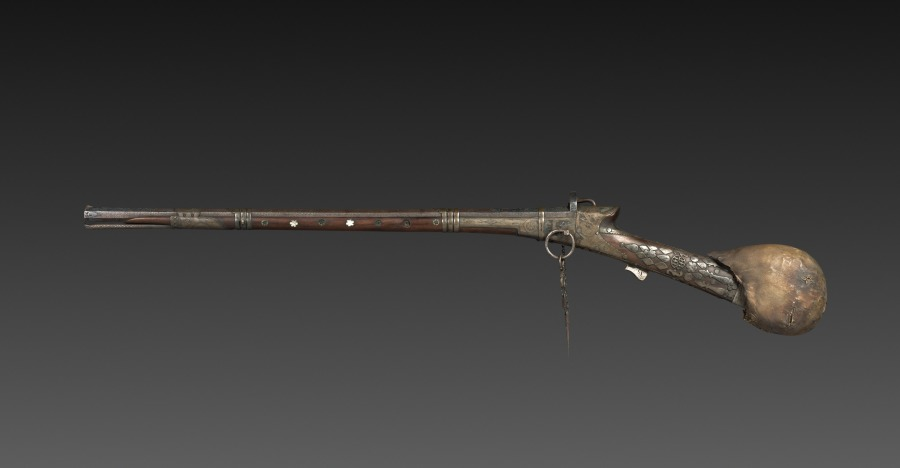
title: Matchlock Musket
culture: Turkey, Ottoman period (1299–1922)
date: c. 1750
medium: Wood, steel, brass, mother-of-pearl inlay, and leather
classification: Arms and Armor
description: Collectively, the Safavid, Mughal, and Ottoman empires are known as the Gunpowder Empires. Particularly from the 1500–1700s, they were among the strongest economic, cultural, and militaristic powers. Each trained and equipped their armies with the latest gunpowder firearms, particularly cannons and muskets. While used in battle, muskets were also used for leisure activities, particularly hunting. The decoration on this musket suggests it was a courtly item, fitted with a leather pad to protect the shooter from the force of the explosion after firing.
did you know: A matchlock musket was loaded from the muzzle end with a scouring stick kept in a sleeve on the underside of the barrel.